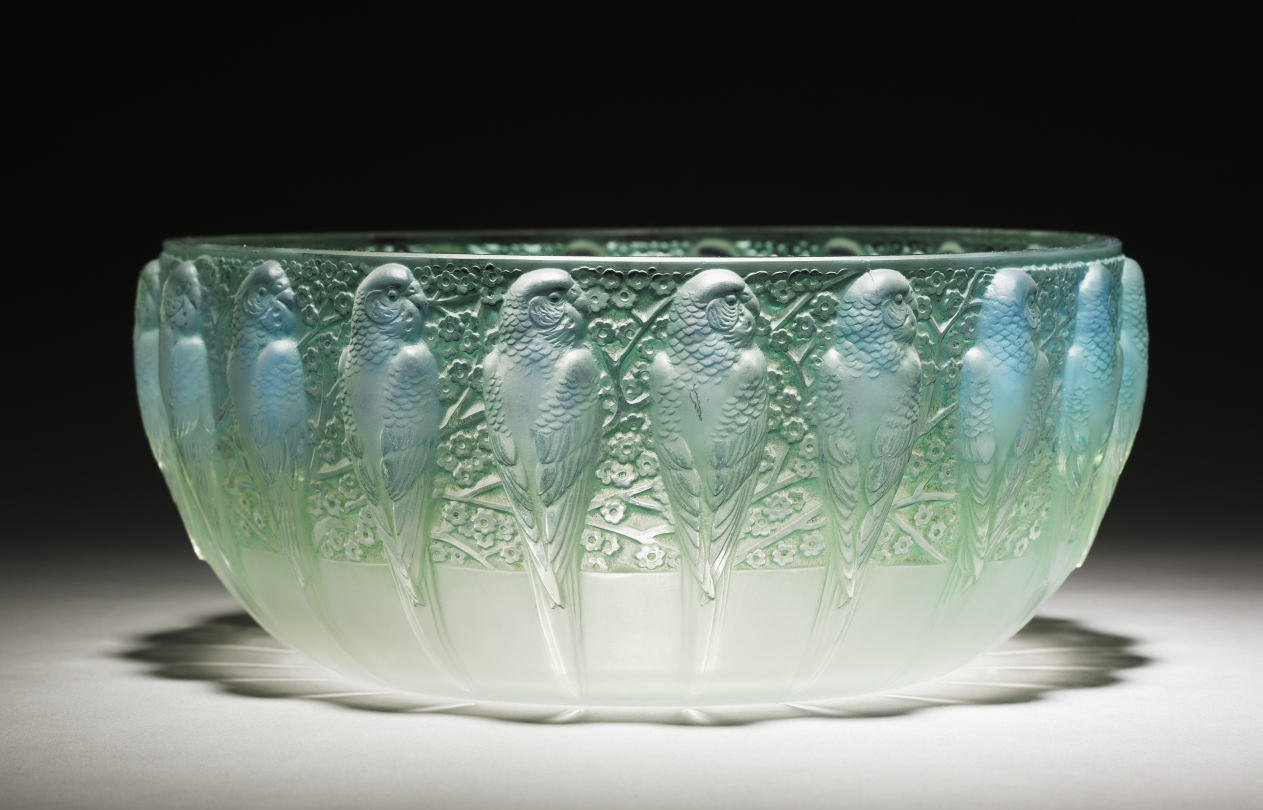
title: Parakeets (Perruches) Bowl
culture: France, 20th century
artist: René Lalique (French, 1860–1945)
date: 1931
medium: glass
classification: Glass